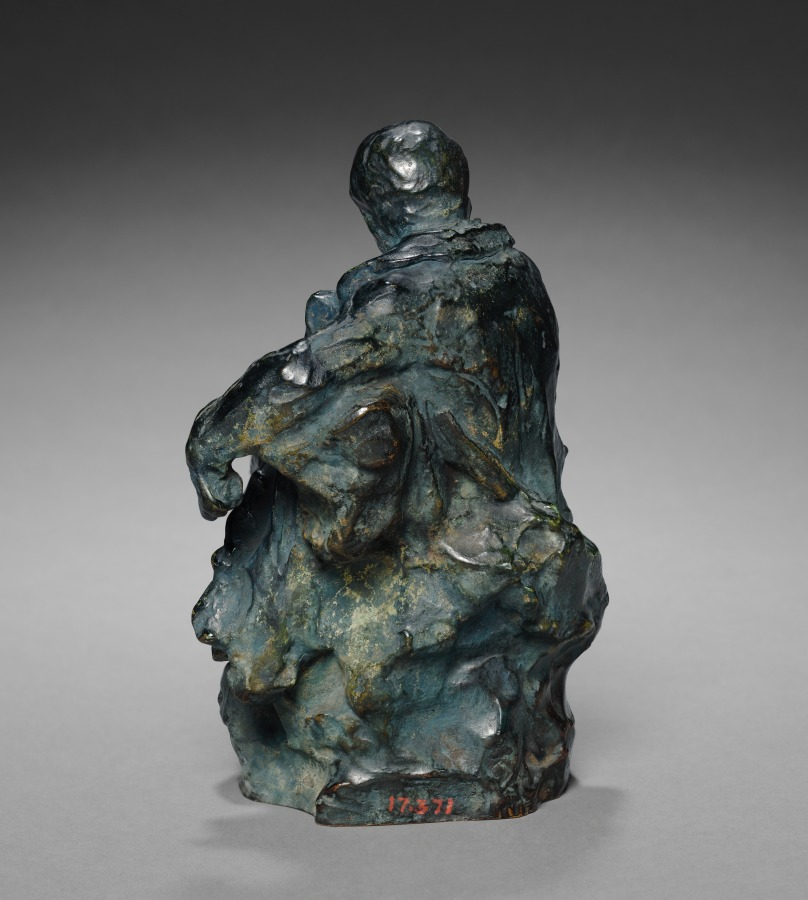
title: Napoleon on St. Helena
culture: France, 19th century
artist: Jean-Baptiste Carpeaux (French, 1827–1875)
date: c. 1860–1870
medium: bronze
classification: Sculpture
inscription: Carpeaux, probably in the wax model, left of Napoleon's foot; on back, an inscription, perhaps the foundry name, has been obliterated with tool marks.